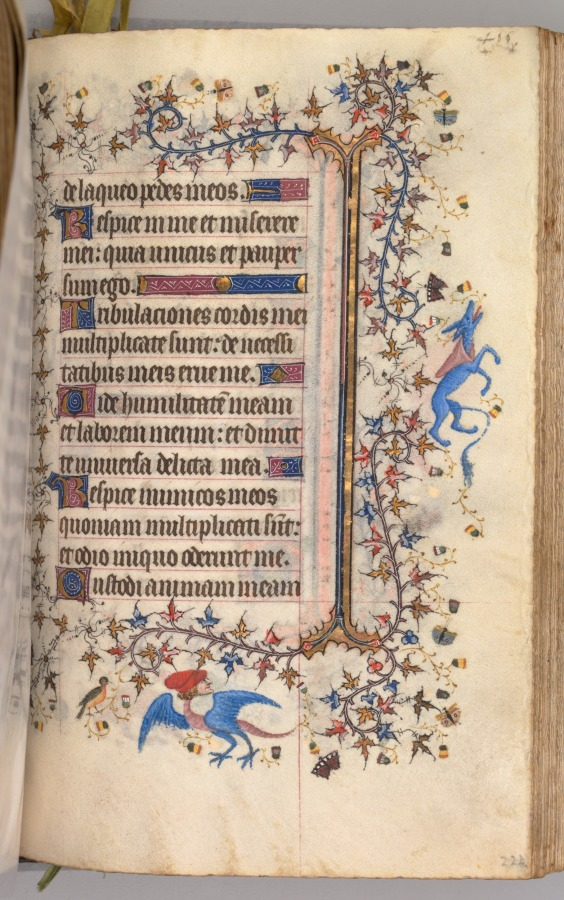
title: Hours of Charles the Noble, King of Navarre (1361-1425): fol. 222r, Text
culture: France, Paris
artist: Master of the Brussels Initials and Associates (French)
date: c. 1405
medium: ink, tempera, and gold on vellum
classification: Bound Volume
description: This precious volume was obviously highly prized by its owner, the French-born King of Navarre, who had his coat of arms painted on no less than twenty folios. Rather than directly commissioning this manuscript from a specific workshop, it seems that Charles the Noble acquired his book of hours -- perhaps ready-made for the luxury market -- while on a trip to Paris in 1404-05. A collaborative effort, six painting styles are evidenced within the pages of this codex, those of two Italians, two Frenchmen, and two Netherlanders. The painter who was responsible for the planning and decoration of the book, and who produced seventeen of the large miniatures, was a Bolognese artist known as the Master of the Brussels Initials. His principal assistant, responsible for most of the borders, was a Florentine who signed his name "Zecho" da Firenze on folio 208 verso.